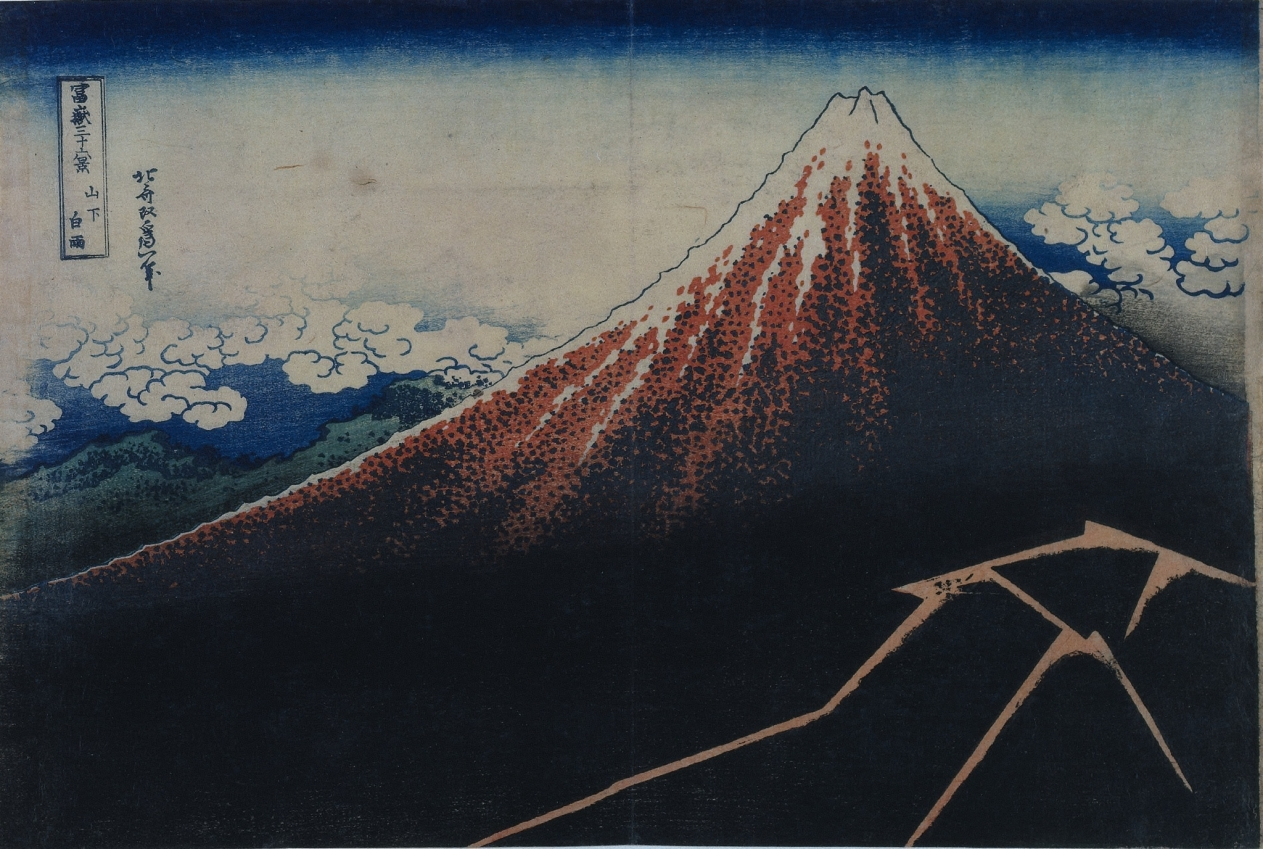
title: Rain Below the Mountain (from the series Thirty-six Views of Mt. Fuji)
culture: Japan, Edo period (1615–1868)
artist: Katsushika Hokusai (Japanese, 1760–1849)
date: early 1830s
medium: color woodblock print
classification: Print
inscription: Signature: Hokusai aratame Iitsu hitsu.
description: Hokusai probably composed this print as a complement to Mt. Fuji in Clear Weather (see CMA 1930.189) and to illustrate the mountain’s majesty in different weather. Here, a sudden shower covers most of the mountain’s base and slope with dark clouds.